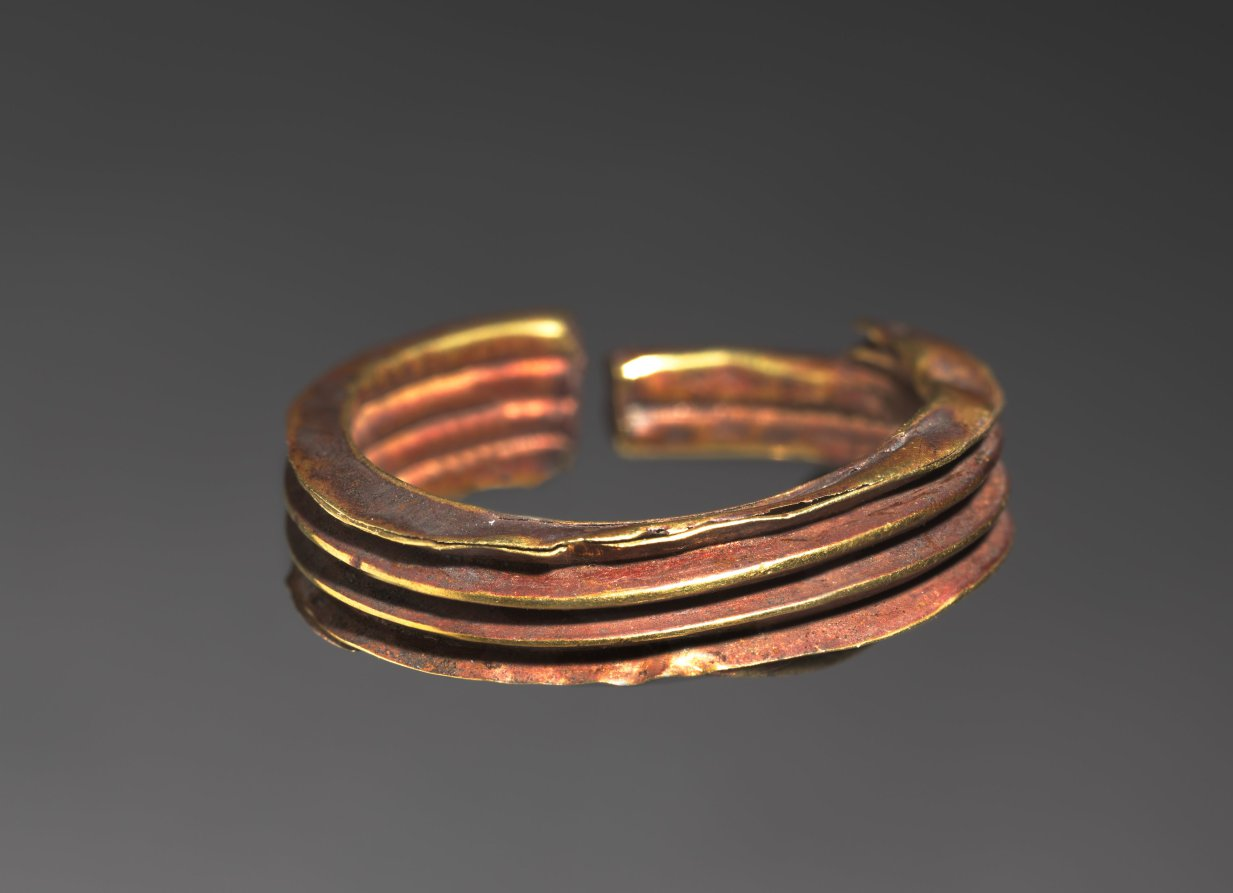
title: Penannular Ribbed Earring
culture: Egypt, New Kingdom (1540–1069 BCE), Dynasty 18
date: 1540–1440 BCE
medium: gold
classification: Jewelry